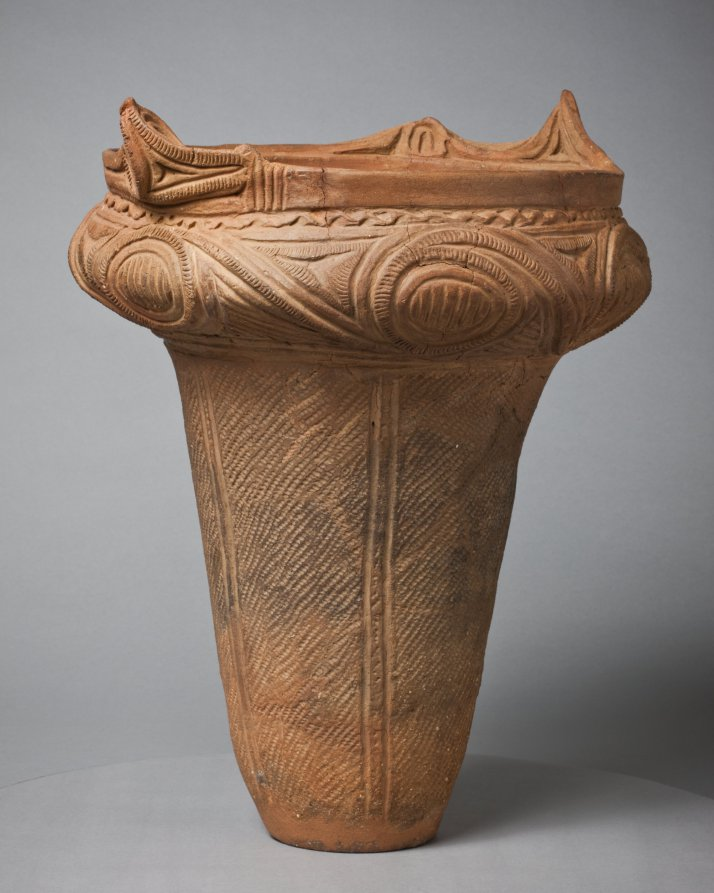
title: Urn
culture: Japan, Jōmon period (c. 10,500–300 BCE)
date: c. 2000 BCE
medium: earthenware, terracotta, impressed and incised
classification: Ceramic